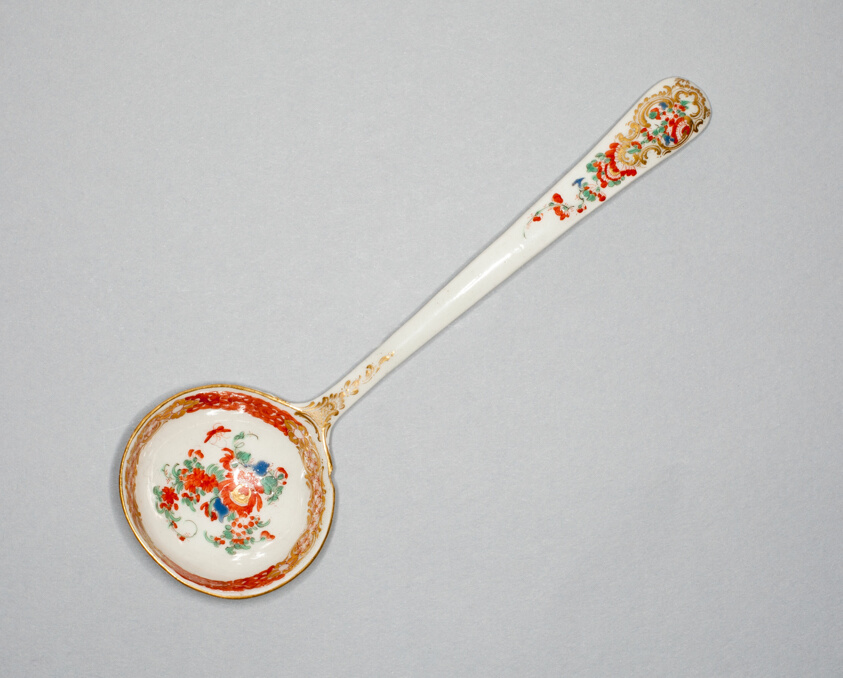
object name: Ceramics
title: Ladle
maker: Worcester Porcelain Factory (Warmstry House Period, 1751–1783); Worcester, England, founded 1751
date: c. 1765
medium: Soft-paste porcelain with polychrome enamels and gilding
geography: Worcester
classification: ceramics; tableware; porcelain; european decorative arts